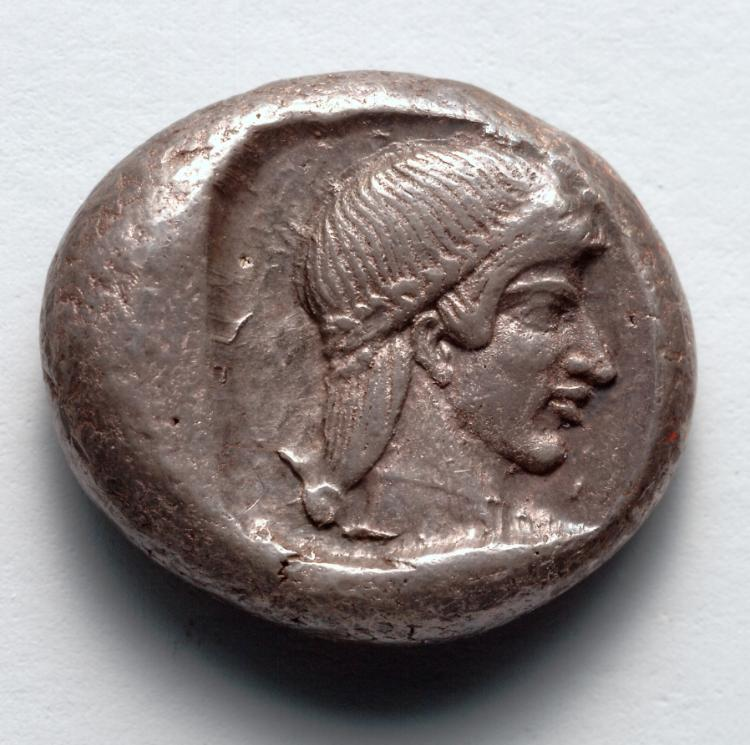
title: Drachm: Head of Aphrodite, r., within incuse square (reverse)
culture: Greek, minted at Knidos (Karia)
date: 465–449 BCE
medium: silver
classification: Coins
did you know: Although produced in the Classical period, this profile head of Aphrodite retains an Archaic look.